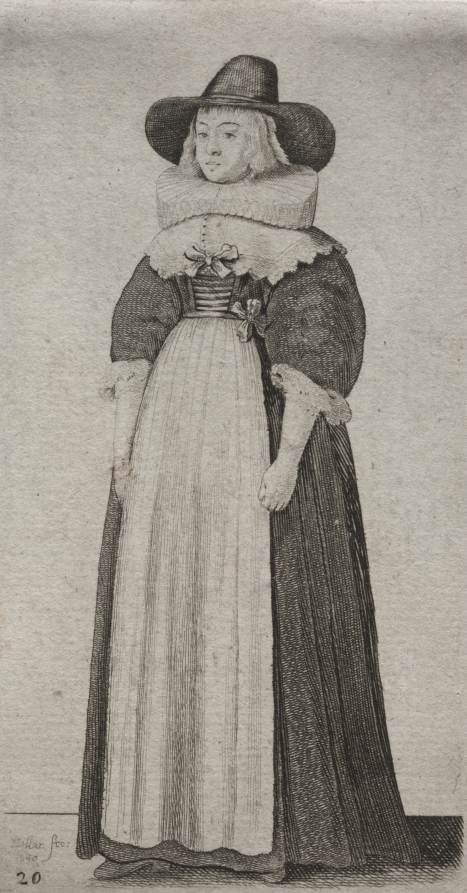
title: The Several Habits of English Women, from the Nobility to the Country Women as they are in these times: The Woman with a Mannish Hat and Ribboned Bodice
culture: Bohemia, 17th century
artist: Wenceslaus Hollar (Bohemian, 1607–1677)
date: 1640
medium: etching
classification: Print